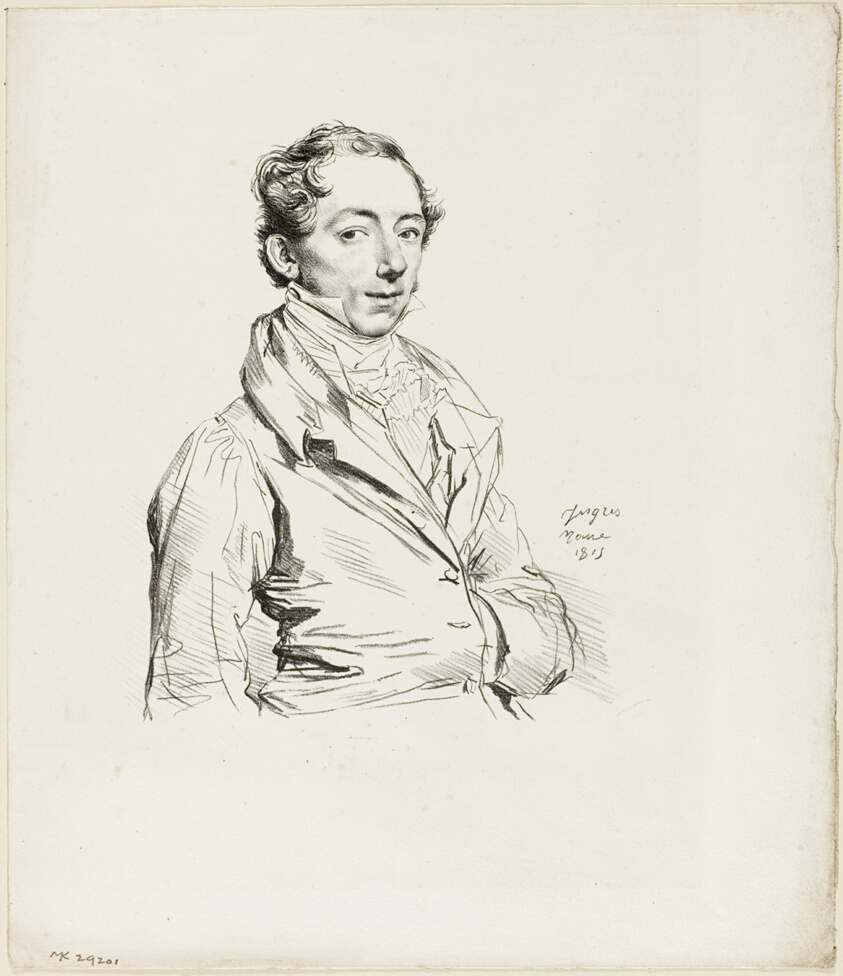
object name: Print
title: Frederic Sylvester Douglas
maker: Jean–Auguste–Dominique Ingres; French, 1780–1867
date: 1815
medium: Lithograph on paper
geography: France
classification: lithograph; print; prints and drawing